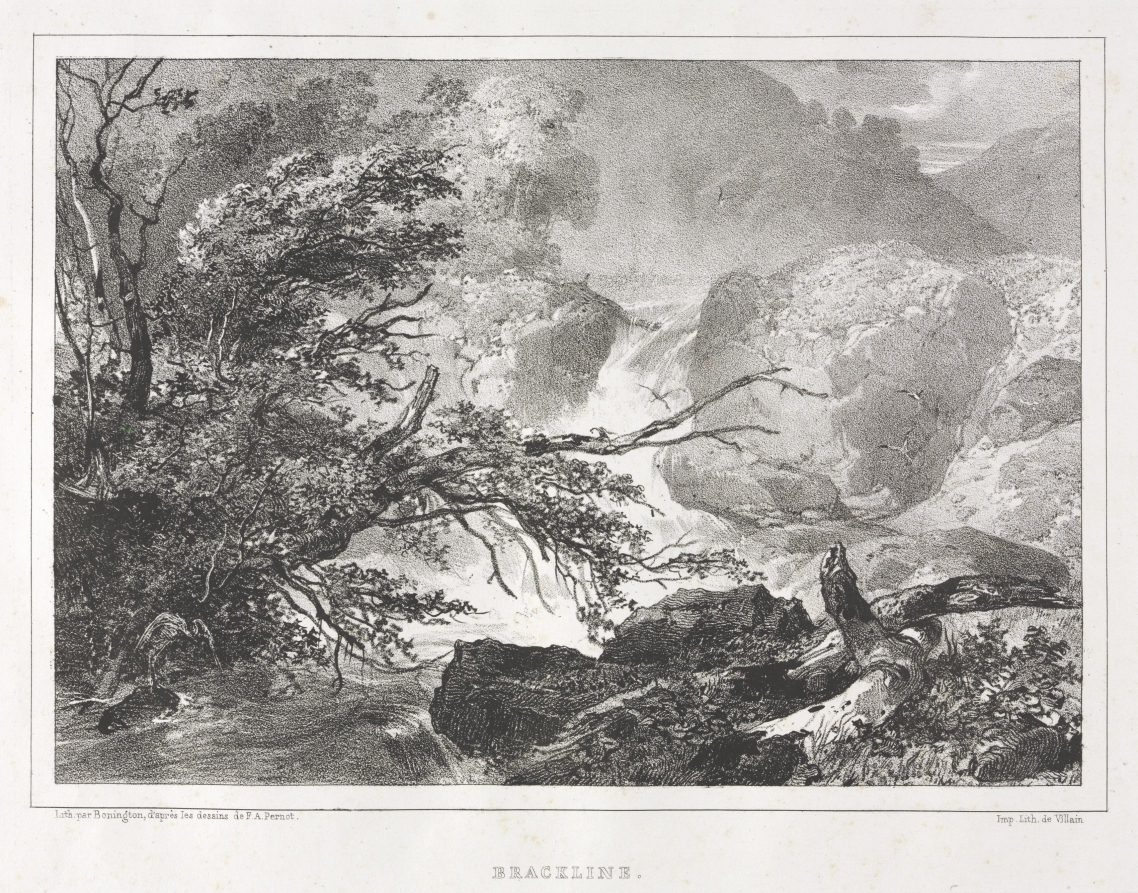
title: Picturesque Views of Scotland: Brackline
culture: England, 19th century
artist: Richard Parkes Bonington (British, 1802–1828)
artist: after François Alexandre Pernot (French, 1793–1865)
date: 1826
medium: lithograph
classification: Print